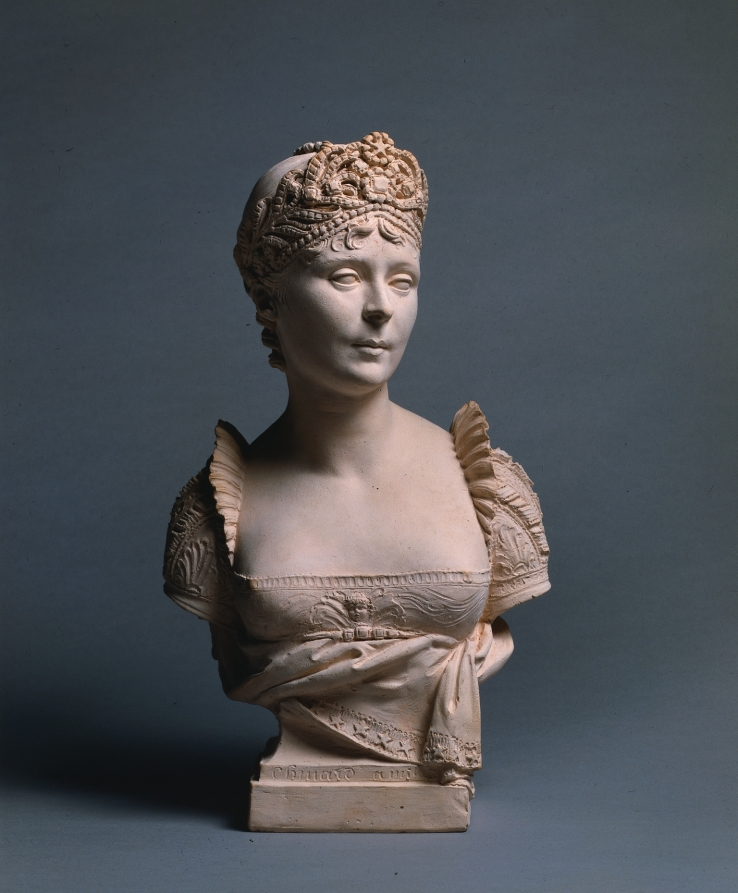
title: Bust of Empress Josephine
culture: France, 19th century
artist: Joseph Chinard (French, 1756–1825)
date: 1805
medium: terracotta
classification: Sculpture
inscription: inscribed on front of base in ligature: "chinard a milan"; inscribed on back of base in ligature: "chinard/de/l'institut m(al?)/membre de plusiere [sp]/ academies/milan-an l (3?)"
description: This bust of the Empress Josephine was sculpted in Milan in 1805 when she accompanied Napoleon to that city for his coronation as the King of Italy.